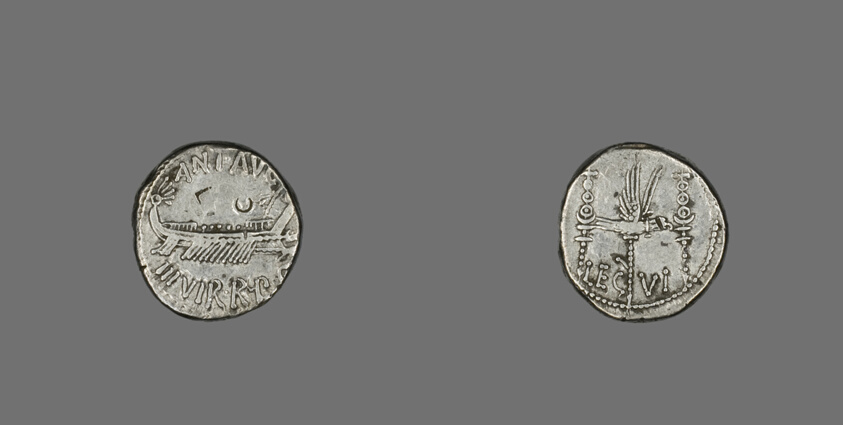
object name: Coin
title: Denarius (Coin) Depicting a Galley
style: republic period, ancient, roman (ancient, style or period)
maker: Roman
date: 32-31 BCE, issued by Marc Antony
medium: Silver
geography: Roman Empire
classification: coin; ancient art; struck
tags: ships